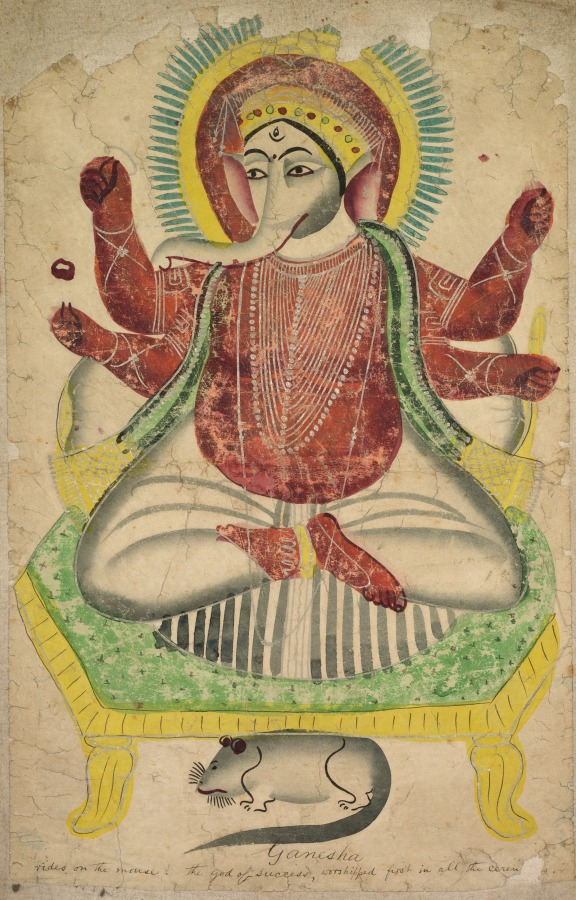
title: Ganesh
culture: Eastern India, Bengal, Kolkata, Kalighat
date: c. 1890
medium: Gum tempera, graphite, and tin on paper lined with cloth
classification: Painting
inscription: [[lower center]] Ganesha rides on the mouse. The god of success, worshipped first in all the cerem[onie]s.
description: The elephant-headed deity who is worshipped as the remover of obstacles is shown here seated in majesty with a radiant halo. The painting has been executed in the rapid, gestural style used by artists at Kalighat to create inexpensive souvenirs for pilgrims to bring home for veneration in domestic devotional spaces.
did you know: His copious jewlery has been painted in tin, a less expensive metallic pigment than silver.